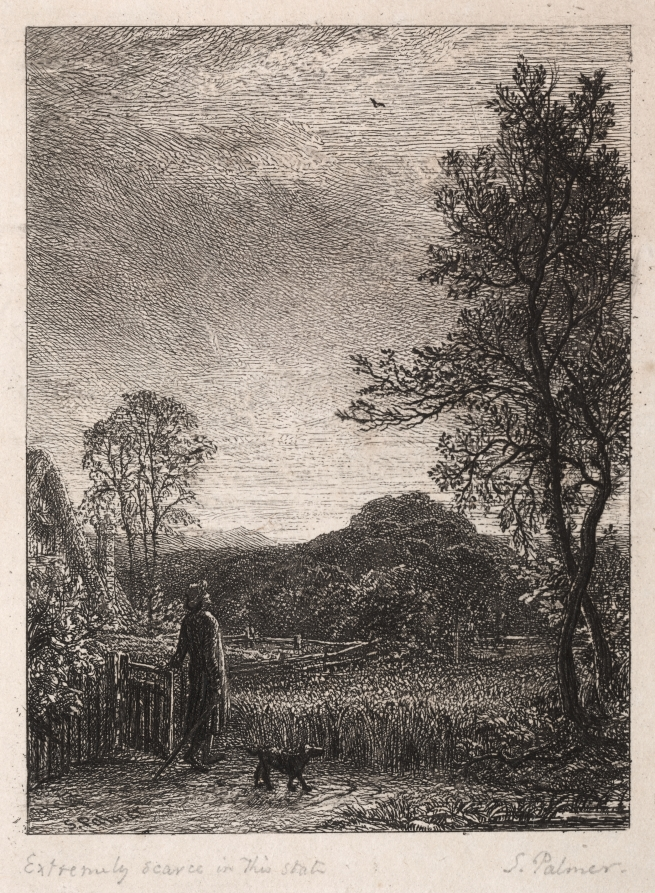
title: The Skylark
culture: England, 19th century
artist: Samuel Palmer (British, 1805–1881)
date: 1850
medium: etching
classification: Print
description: Palmer came to printmaking relatively late in his career in 1850 when he was elected to the Etching Club in London. He created a significant number of landscape etchings, intricate in detail and sonorous in chiaroscuro. In The Skylark, one of Palmer’s earliest compositions, a solitary figure in a rural landscape contemplates the flight of a songbird. Palmer has been compared to the German Romantic artist Caspar David Friedrich (also in this exhibition), who produced images infused with a similarly indefinable atmosphere of calm, mystery, and breathless silence.